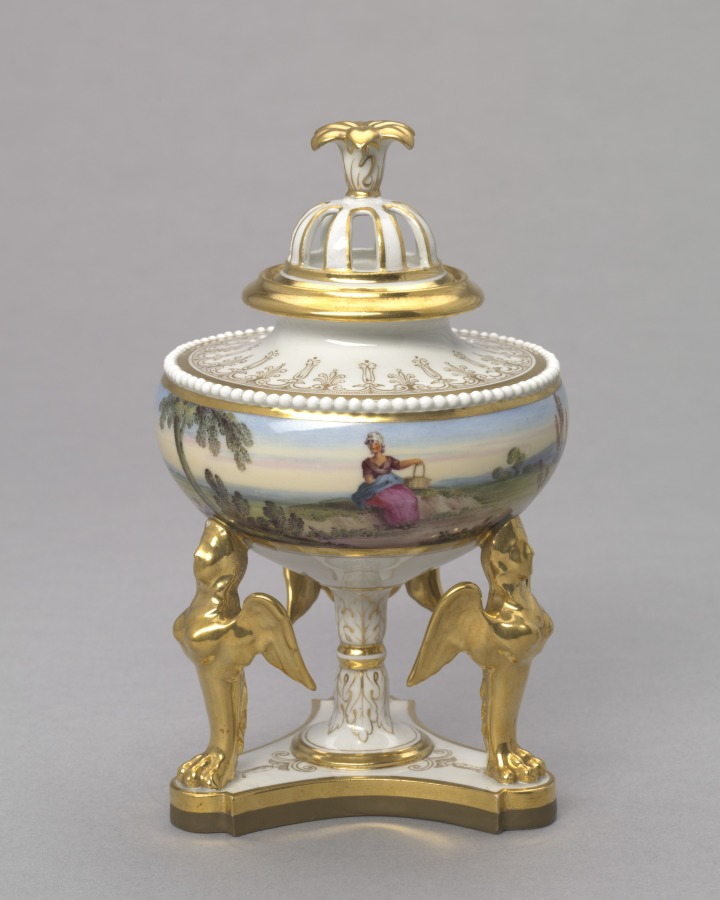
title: Urn and cover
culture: England, Worcester, 19th century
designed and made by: Flight, Barr and Barr (British)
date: c. 1815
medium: artificial porcelain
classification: Ceramic